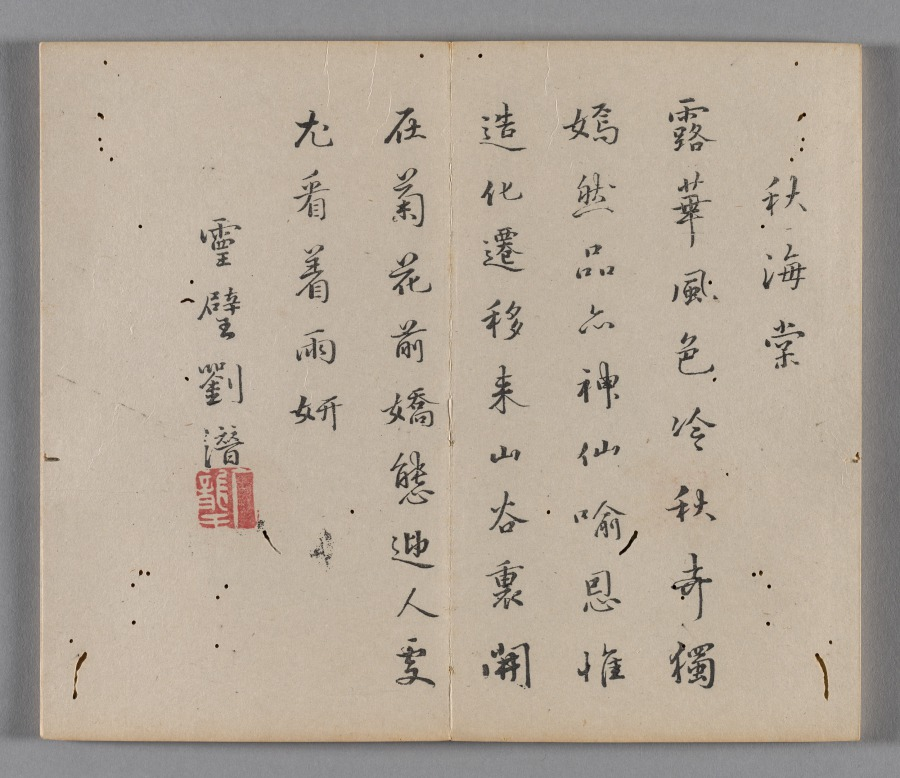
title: Ten Bamboo Studio Painting and Calligraphy Handbook (Shizhuzhai shuhua pu): Miscellaneous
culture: China, Qing dynasty (1644-1911)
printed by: Hu Zhengyan (Chinese, c. 1584–1674)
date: 1633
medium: Woodblock-printed book; ink and colors on paper; first edition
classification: Print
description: Color printing reached a level of perfection in the early 1600s, as seen in this Ten Bamboo Studio Collection of Calligraphy and Painting and the Mustard Seed Garden Manual of Painting (printed 1679 and 1701). The painterly quality, precision in registering (aligning) the woodblocks, and harmonious colors made them the most successful color print editions in Chinese history. Both editions were printed and compiled in Nanjing, spread nationwide, and had a great impact on the arts in Japan and Korea.